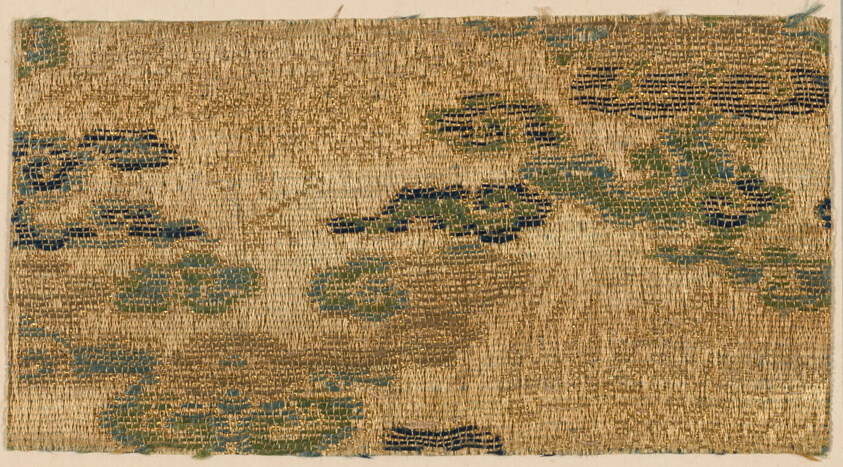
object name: Textile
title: Fragment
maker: Japan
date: Edo period (1615–1868)/Meiji period (1868–1912), 17th/19th century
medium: Plain compound satin, silk & gilt paper; 3 strips to m.m.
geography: Japan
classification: textile; weaving